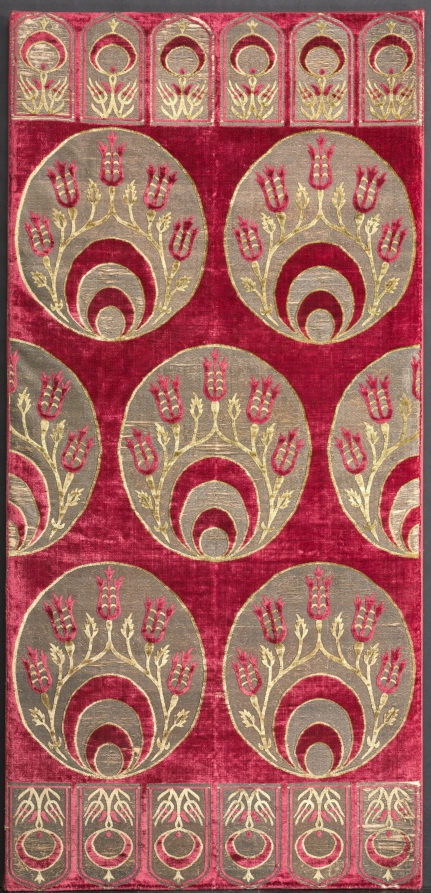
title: Brocaded velvet cushion cover with crescents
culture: Turkey, Istanbul or Bursa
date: 1525–75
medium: velvet, brocaded: silk, gilt- and silver-metal thread, and cotton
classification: Velvet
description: This cushion cover is one of the earliest and highest quality examples that has survived. The vibrant pattern displays large crescents inscribed with smaller crescents and elegant rosebuds on a leafy vine. The six-pointed lappet designs across each end identify its function as a cover for a cushion on a divan, the equivalent of a Western sofa. The elegant yet lively quality of the drawing, velvet weave, and dense metal thread indicate that it was made near the height of Ottoman silk textile production in the mid-1500s.